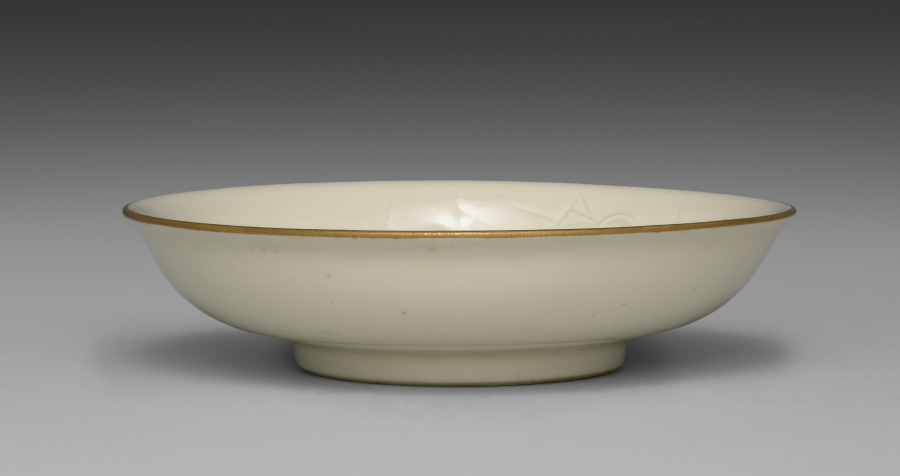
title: Small Dish from Dining Set with Plum Blossoms and Cracked-Ice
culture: Japan, Meiji period (1868–1912)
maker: Seifū Yohei II (Japanese, 1844–1878)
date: c. 1875–78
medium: Porcelain with molded designs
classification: Ceramic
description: Each item in this set has a delicate low-relief design of flowering plum branches over scattered, intersecting lines meant to resemble the cracked-ice surface of a frozen body of water and is signed on the base in gold pigment. While Yohei II produced many fine works in underglaze blue, like those produced by Kiyomizu Shichibei, he also made works in quite different styles later in his career, from the early 1870 s. In 1873, he was appointed purveyor to the Industrial Center of Kyoto Prefecture, a designation associated with Kyoto’s efforts to reach an international market through the port of Kobe; and from 1875 until his death, he was involved in national-level projects to present Japanese ceramics across the world. It was during this period that Yohei III was apprenticed to Yohei II, and it has been suggested that this set may in fact be an early example of Yohei III’s work, which he signed with his teacher’s name. Decorated with flowers resembling Japanese textile motifs, the set calls to mind the design of Yohei II’s pair of vases with plum blossoms in the Victoria and Albert Museum. Here, the elaborate trees created for a formal public exhibition setting have been translated into the approachable blossoms of the genteel domestic environment. While the designs are consistent across the pieces, each raised flower petal and pistil and each incised line in the ice was done by hand, so the cups, bowls, and dishes are similar yet unique. The bottoms of two boxes once identified the set’s owner, but the information has been deliberately obscured with black ink. However, inscriptions still visible appear to indicate two occasions, once at the end of July 1886 , and once again in June 1916 , when parts of the set were requested from Hokura in Niigata Prefecture. The location corresponds to a neighborhood in the present-day city of Jōetsu. The surname Tsuji 辻 also appears on a paper tag affixed to one of the box cloths. Future research may possibly reveal more about their provenance. A vase by Yohei III in a private collection combines the formal grandeur of the Yohei II vases in the Victoria and Albert Museum with the gentler design of this dining set, placing flowering plum trees against soft, scalloped-edge clouds resembling those in golden screens.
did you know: The dining wares have a creamy white coloration that the four boxes containing them identify as Korean in style.